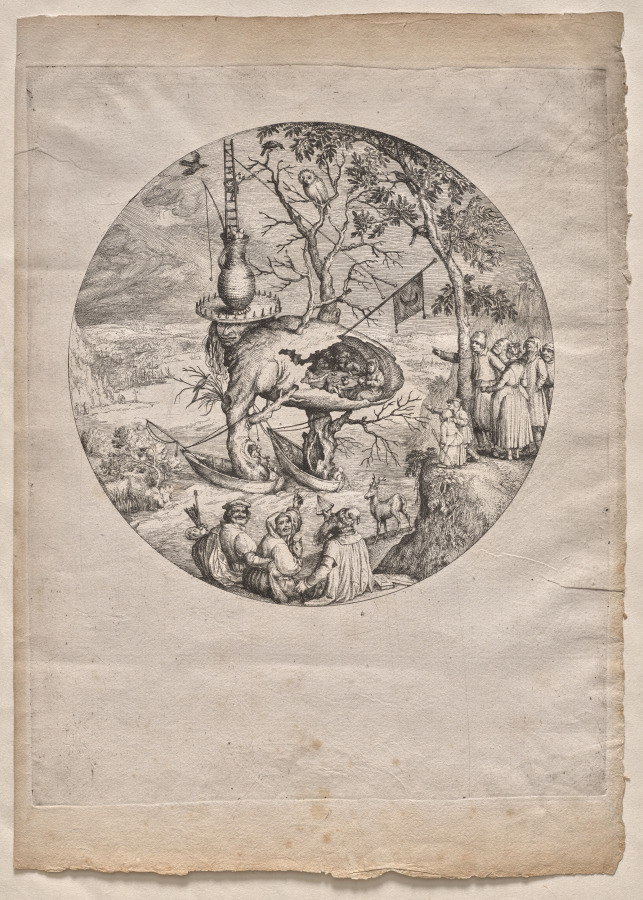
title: The Tree Man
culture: Netherlands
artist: after Hieronymous Bosch (Netherlandish, c. 1450–1516)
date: c. 1560–1600, first edition printed c. 1715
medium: etching and engraving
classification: Print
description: Hieronymus Bosch is largely considered the first European artist to give free rein to his imagination, as embodied in his depiction of fantastic, often diabolical creatures in the context of the traditional Catholic altarpiece. Based on a drawing by Bosch now at the Albertina Museum, Vienna, this etching of the Tree Man cleverly and uncannily merges anthropomorphic, organic, and man-made elements into a monstrous creature who stands at the center. The creature combines various proverbial subjects that appear throughout Bosch’s oeuvre, such as a ship of fools (denoting collective foolishness), and a cracked egg (a symbol of earthly vanity). Onlookers to the right and below act as witnesses to the folly. In the Christian context within which Bosch made the composition, the figure may broadly be understood as an image of sinful decrepitude. Yet, the Tree Man’s significance cannot be reduced to single, definitive meaning.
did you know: At the bottom of the composition Bosch portrays a painter, an astronomer, and an Aesopian figure (or fableist), practitioners who use illusion to convey the world’s truths, and might be interpreted as Bosch himself.